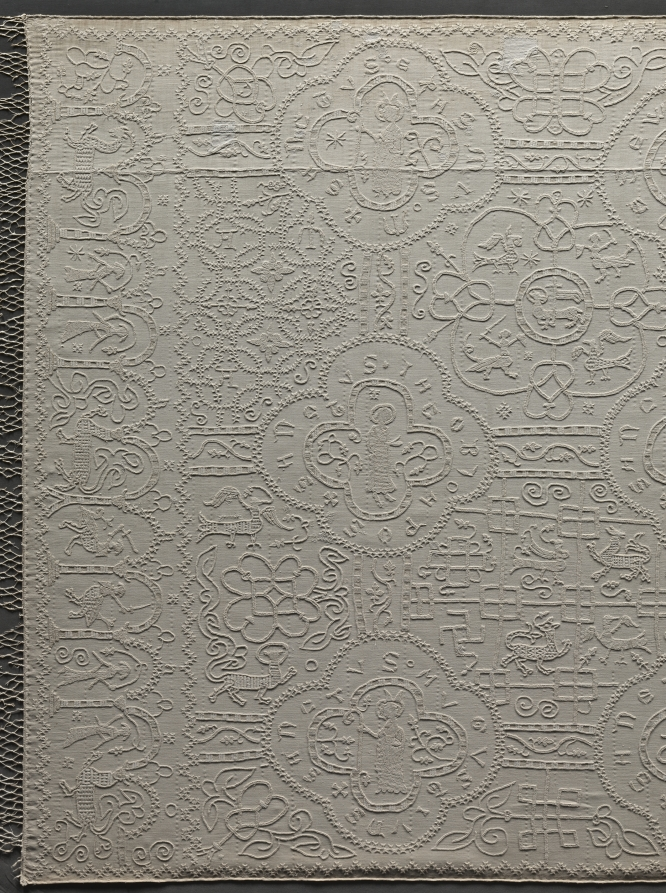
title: Altar Cloth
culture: Germany, Altenberg on the Lahn, Premonstratensian Convent, 14th century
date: c. 1350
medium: embroidery: linen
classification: Embroidery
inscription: various motifs enclosed in quatrefoils with identifying inscriptions in Gothic letters.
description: This large, embroidered altar cloth is one of the rarest, most important medieval church furnishings in existence. It was stitched by nuns in the Premonstratensian Convent in Altenberg on the Lahn River, north of Frankfurt, Germany, and was used to cover the church’s high altar in the weeks leading up to Easter. The cloth is an example of linen embroidery, a specialty of German nuns in the later Middle Ages. The Altenberg monastery church once had valuable furnishings; the high altar retable (a decorated frame with sculptures and paintings on the top of an altar) has survived, the main parts of which are now in the Städel Museum in Frankfurt, Germany.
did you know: When lit from behind, the previously hidden details emerge and the complex design becomes evident.